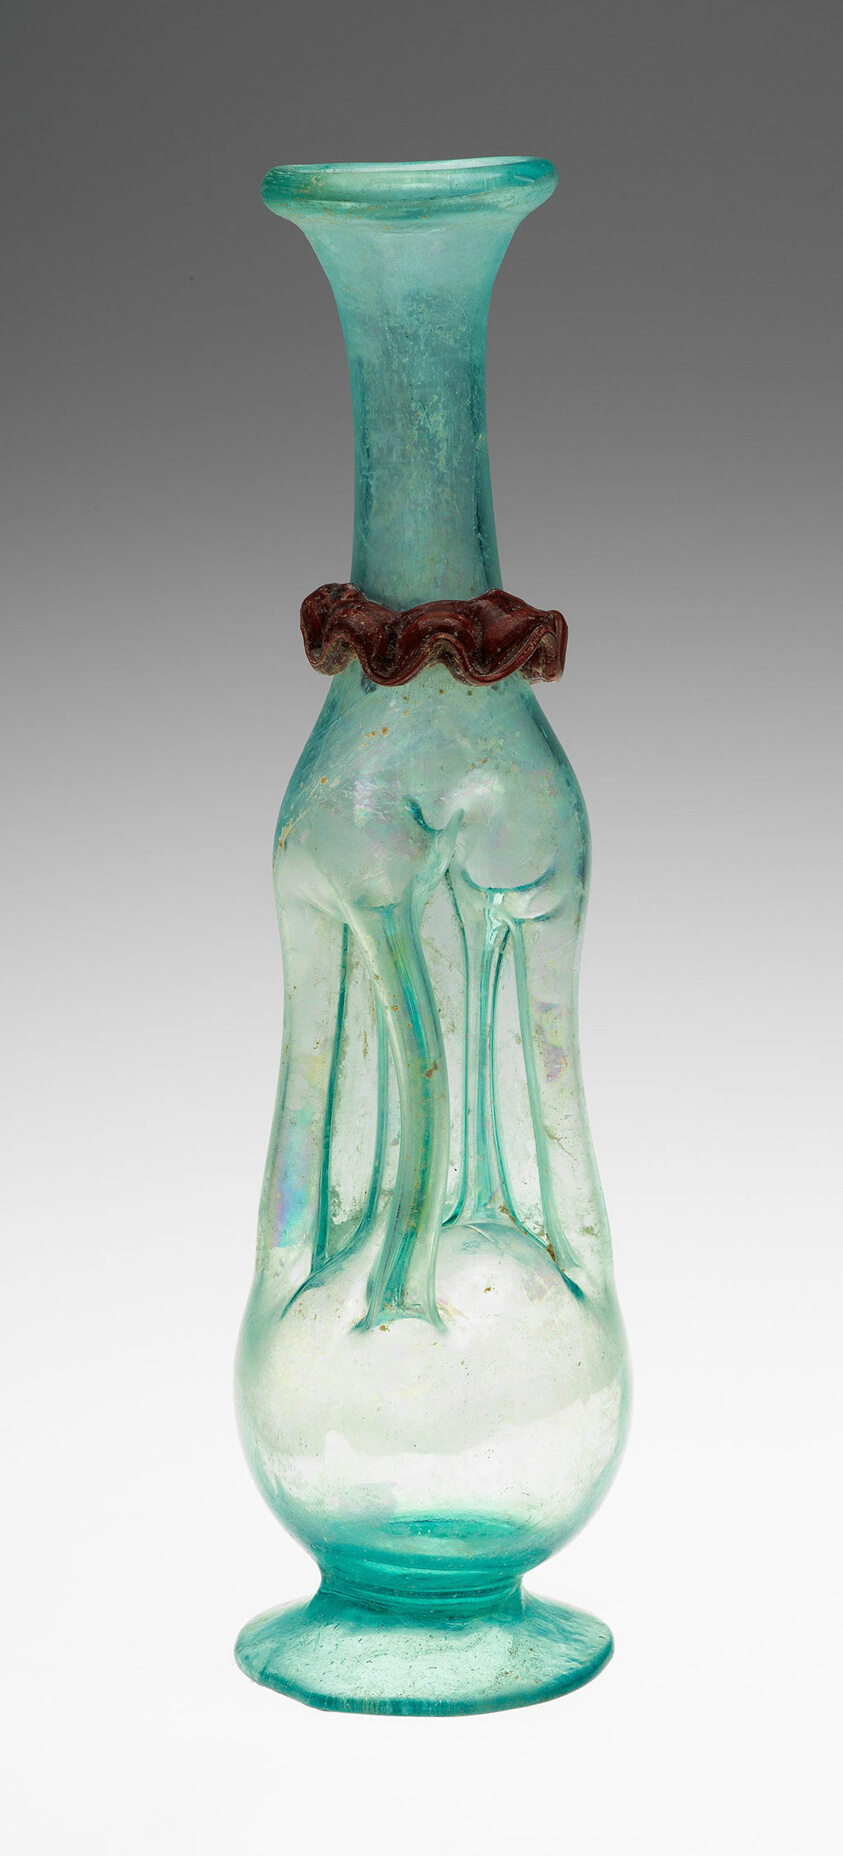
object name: Vessel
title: Kuttrolf (Bottle with Divided Neck)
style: roman (ancient, style or period), syrian, ancient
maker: Late Roman or Byzantine; possibly Eastern Mediterranean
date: 4th century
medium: Glass, blown technique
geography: Syria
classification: vessel; glass; ancient art; container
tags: containers, dining, drinking